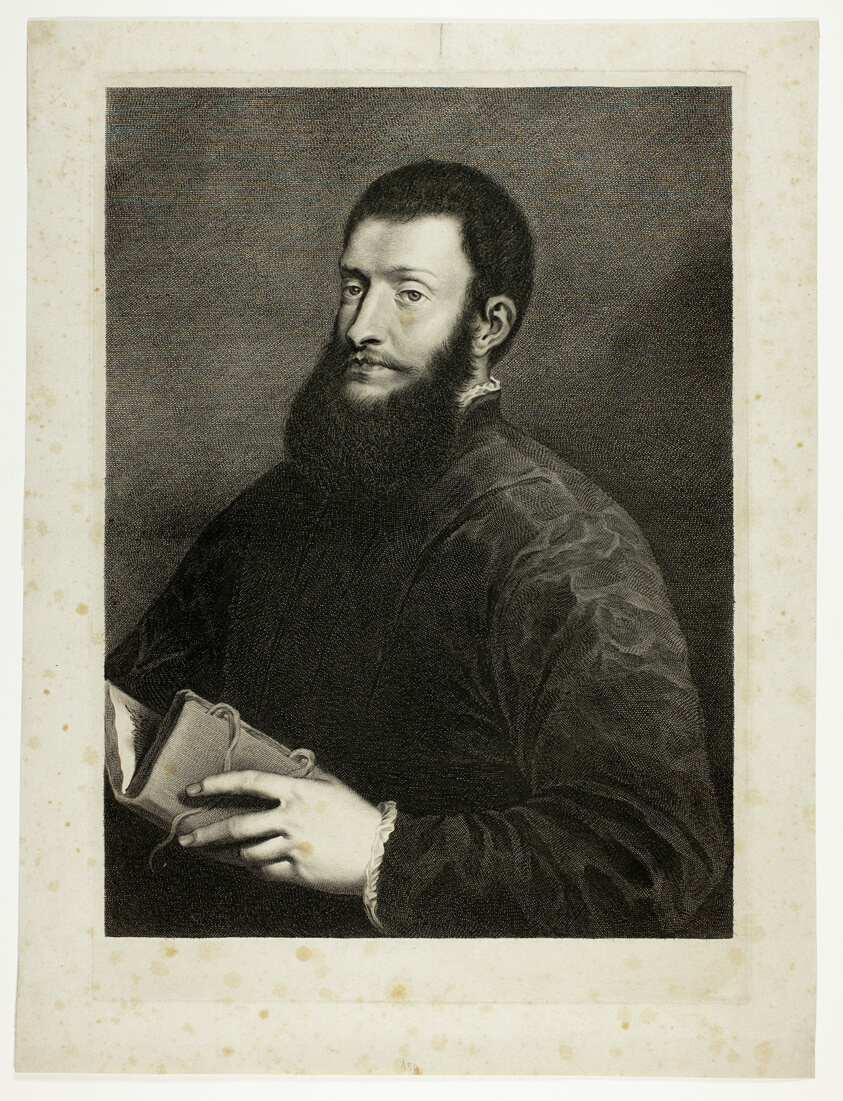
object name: Print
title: Portrait of the Poet Pietro Aretino, from Cabinet Reynst; Variarum imaginum a celeberrimis artificibus pictarum Caelaturae (Cabinet Reynst: Engravings of various images painted by famous artists)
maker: Cornelis van Dalen, II (Dutch, seventeenth century); after Titian (Italian, c. 1488-1576)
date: 1655-1660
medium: Engraving on paper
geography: Netherlands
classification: engraving; print; prints and drawing